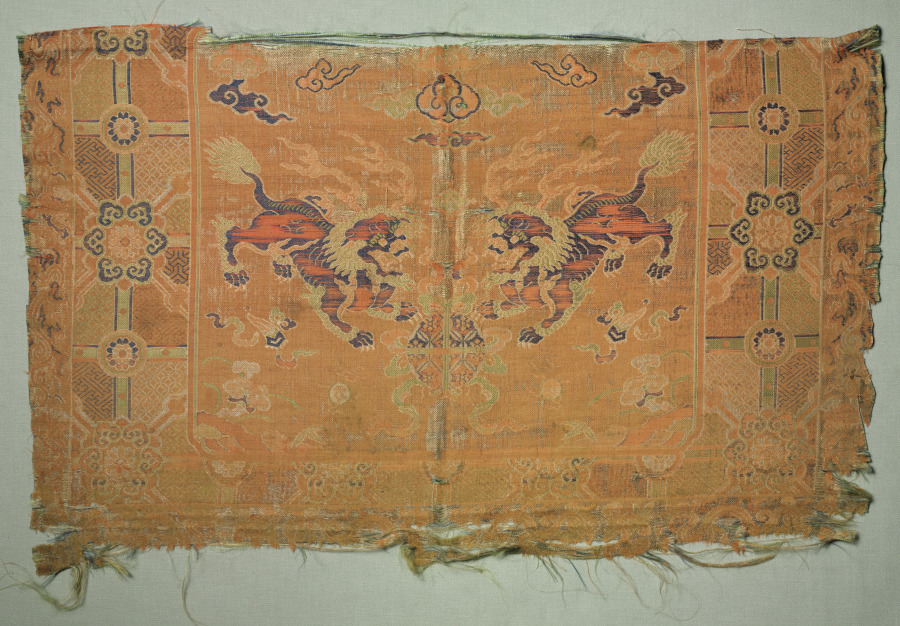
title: Fragment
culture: China, Qing dynasty (1644-1911)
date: 1700–1720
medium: Silk, diaper weave; twill ground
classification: Textile